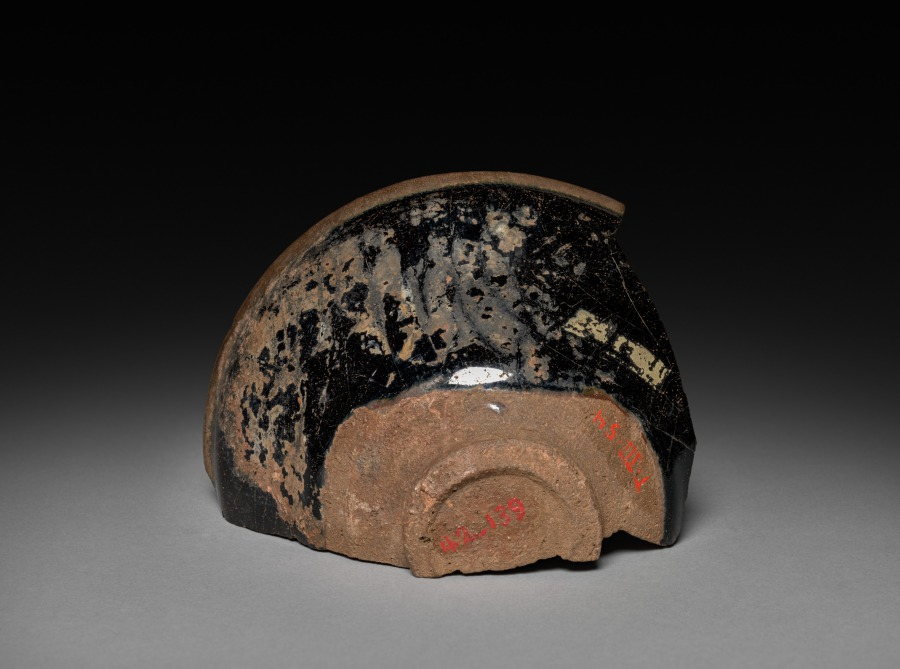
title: Shard of Tea Bowl: Jian ware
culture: China, near Shui ch'i, Song dynasty (960-1279)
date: 960–1279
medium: stoneware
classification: Ceramic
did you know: Jian ware was made of a very hard, coarse grain.